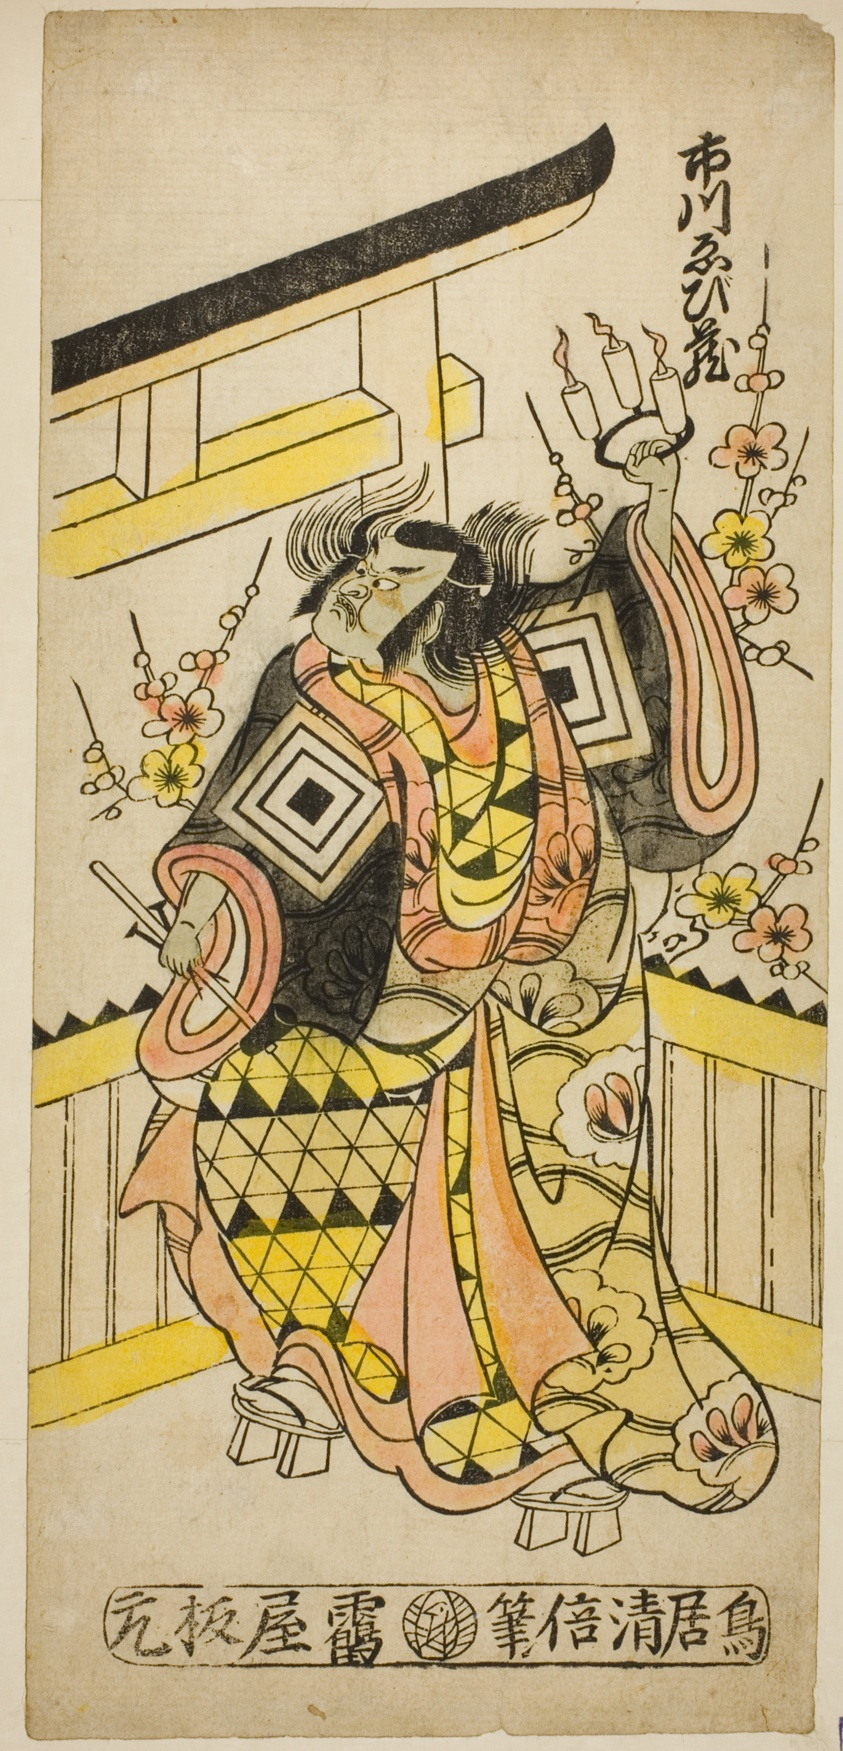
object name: Print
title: The Actor Ichikawa Ebizo II casting a curse at the hour of the ox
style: Japanese (culture or style)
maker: Torii Kiyomasu II (Japanese, 1706 (?)–1763 (?))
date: c. 1745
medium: Hand-colored woodblock print; hosoban, urushi-e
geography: Japan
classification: woodblock print; print; asian art